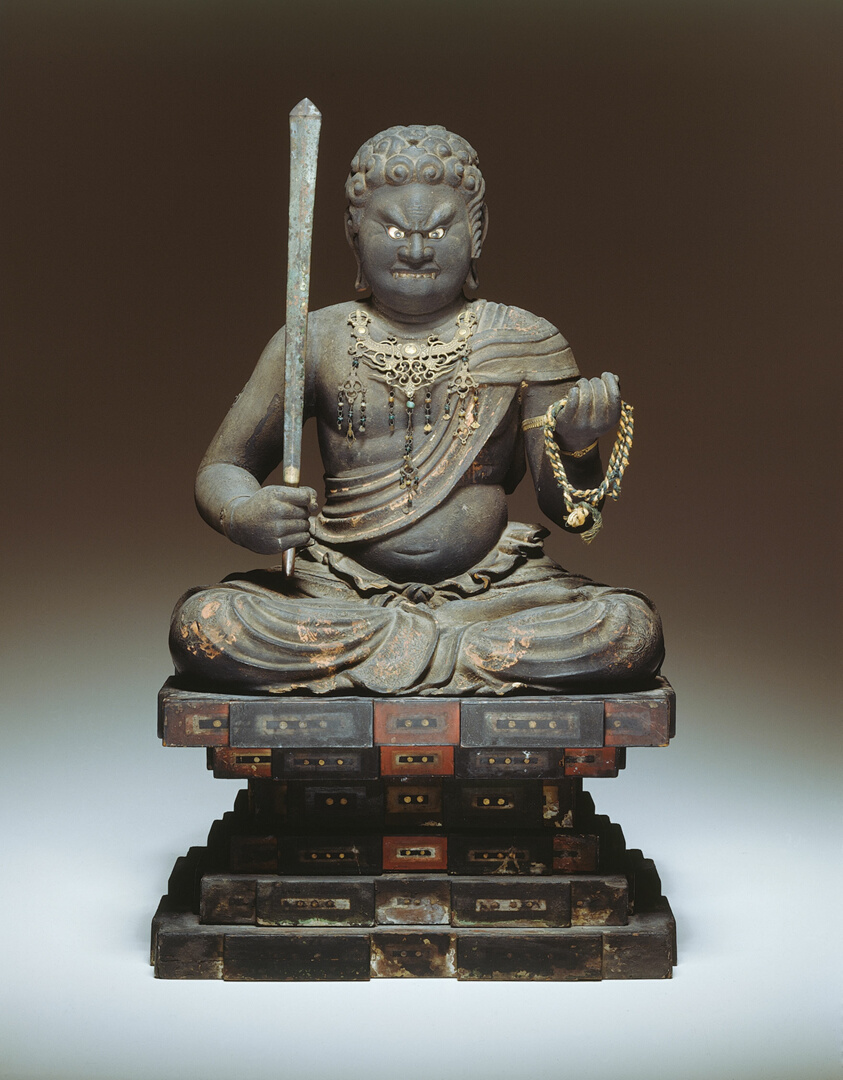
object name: Sculpture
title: Fudo Myo-o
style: Japanese (culture or style)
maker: Japan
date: 13th century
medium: Wood with polychromy and gilt-bronze accessories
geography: Japan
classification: wood; sculpture; asian art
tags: Buddhism, religion